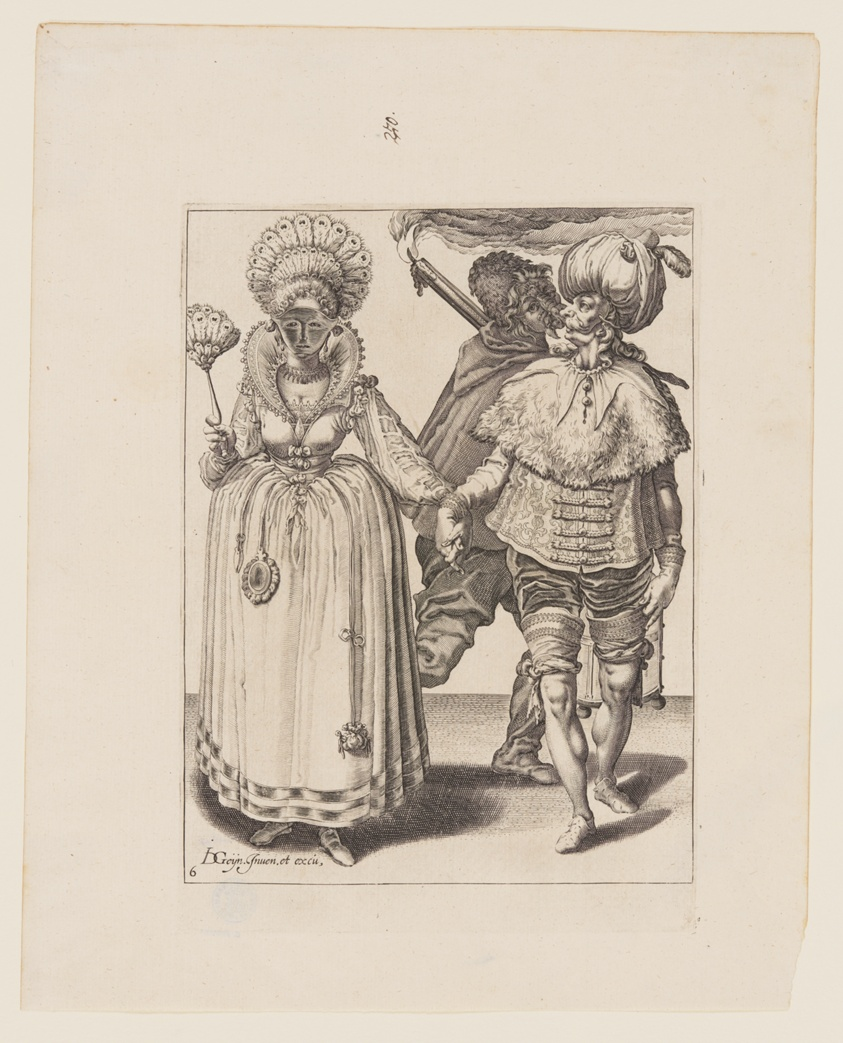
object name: Print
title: Man with a Turban Leading a Woman who is Wearing Peacock Feathers, behind them a Torchbearer, from The Masquerades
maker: Jacques de Gheyn II; Dutch, 1565–1629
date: 1595-96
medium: Engraving on ivory laid paper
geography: Netherlands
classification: engraving; paper; print; prints and drawing